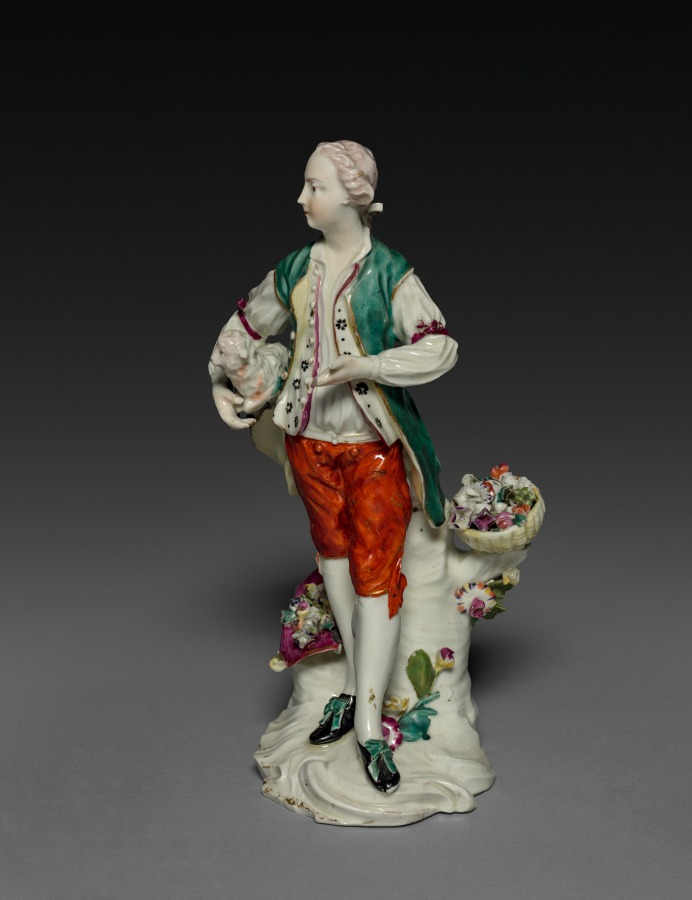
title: Farmer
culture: England, Derby, mid-18th century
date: 1760–1765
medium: soft-paste porcelain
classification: Ceramic